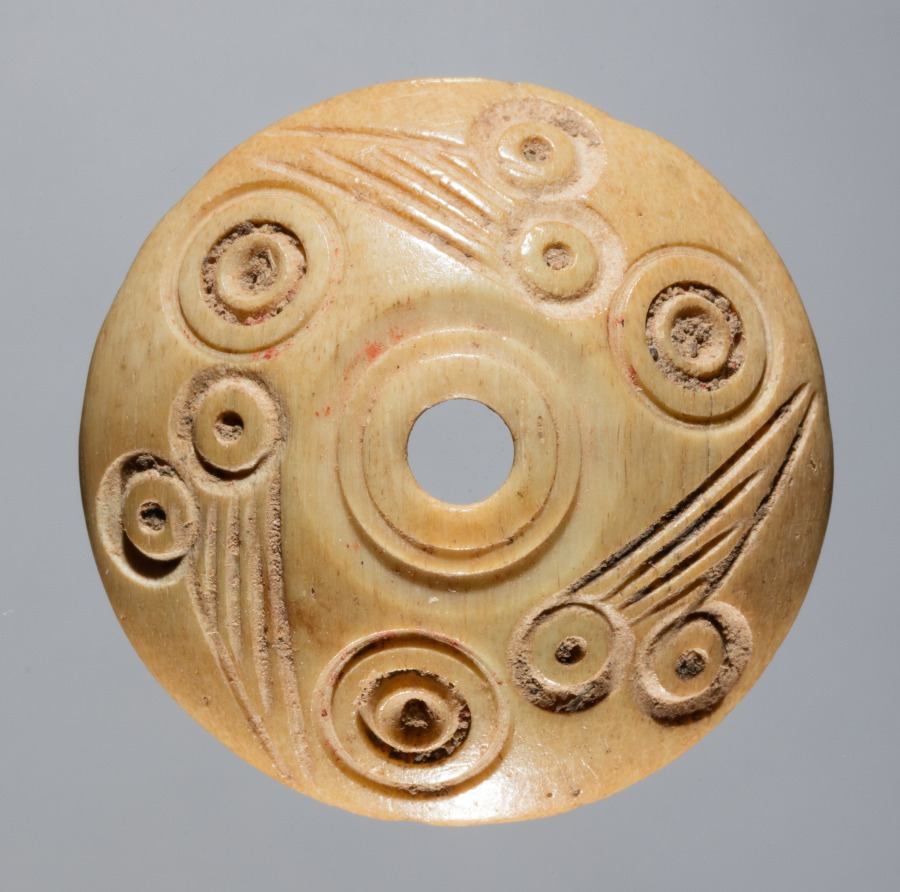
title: Spindle Whorl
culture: Iran, early Islamic period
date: 700s - 900s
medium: bone, incised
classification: Spindle Whorl